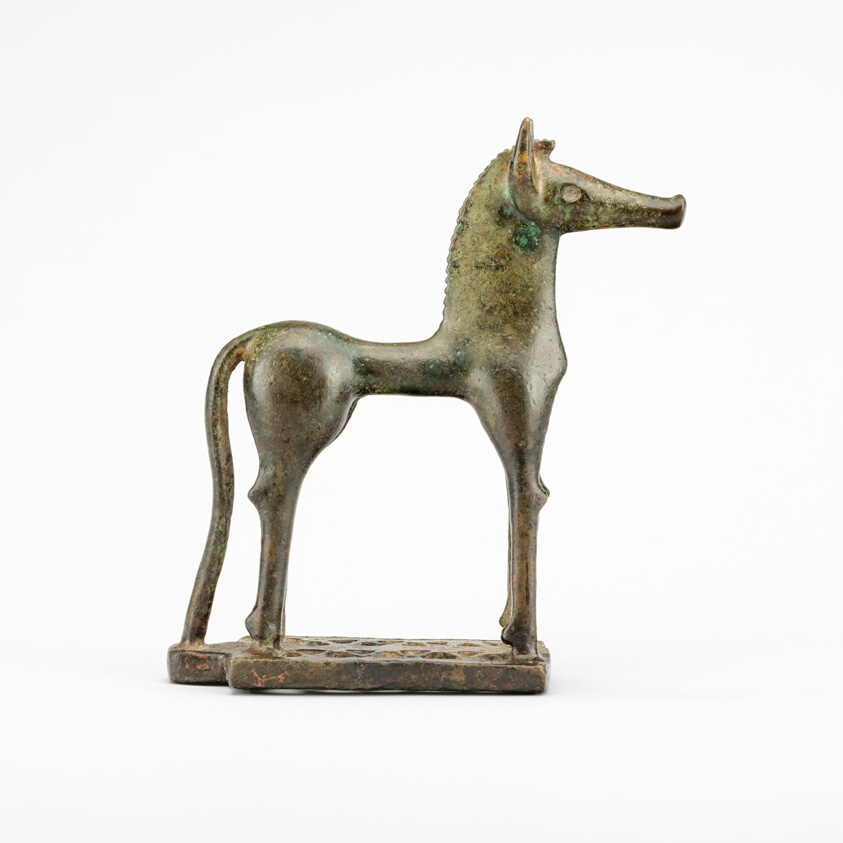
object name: Sculpture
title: Statuette of a Horse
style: archaic (greek), ancient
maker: Greek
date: 750-730 BCE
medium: Bronze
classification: votive offering; ancient art; sculpture; ritual objects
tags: horse, animals